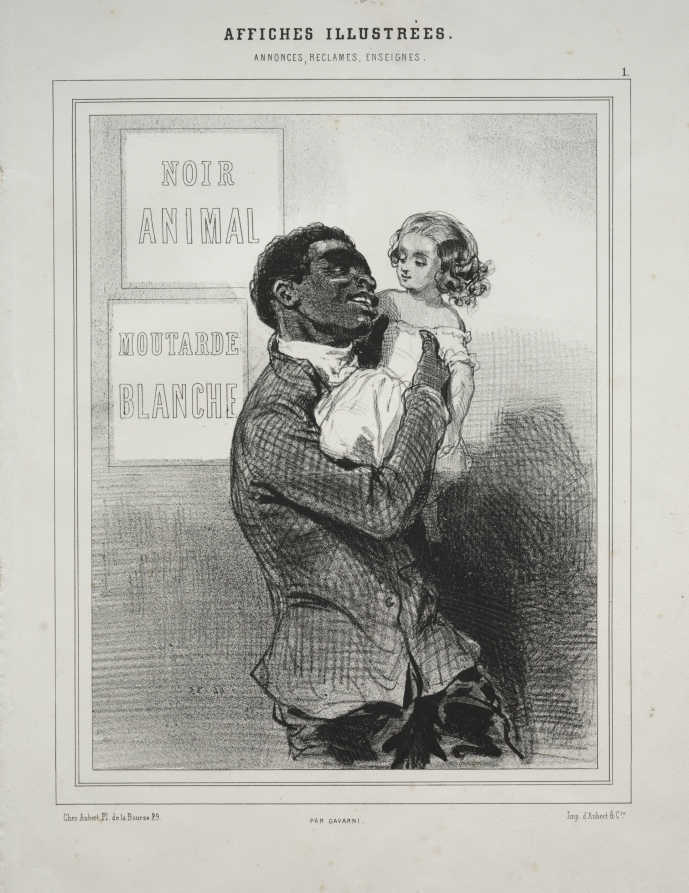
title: Affliches Illustrées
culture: France, 19th century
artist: Paul Gavarni (French, 1804–1866)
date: c. 1844–46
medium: lithograph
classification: Print